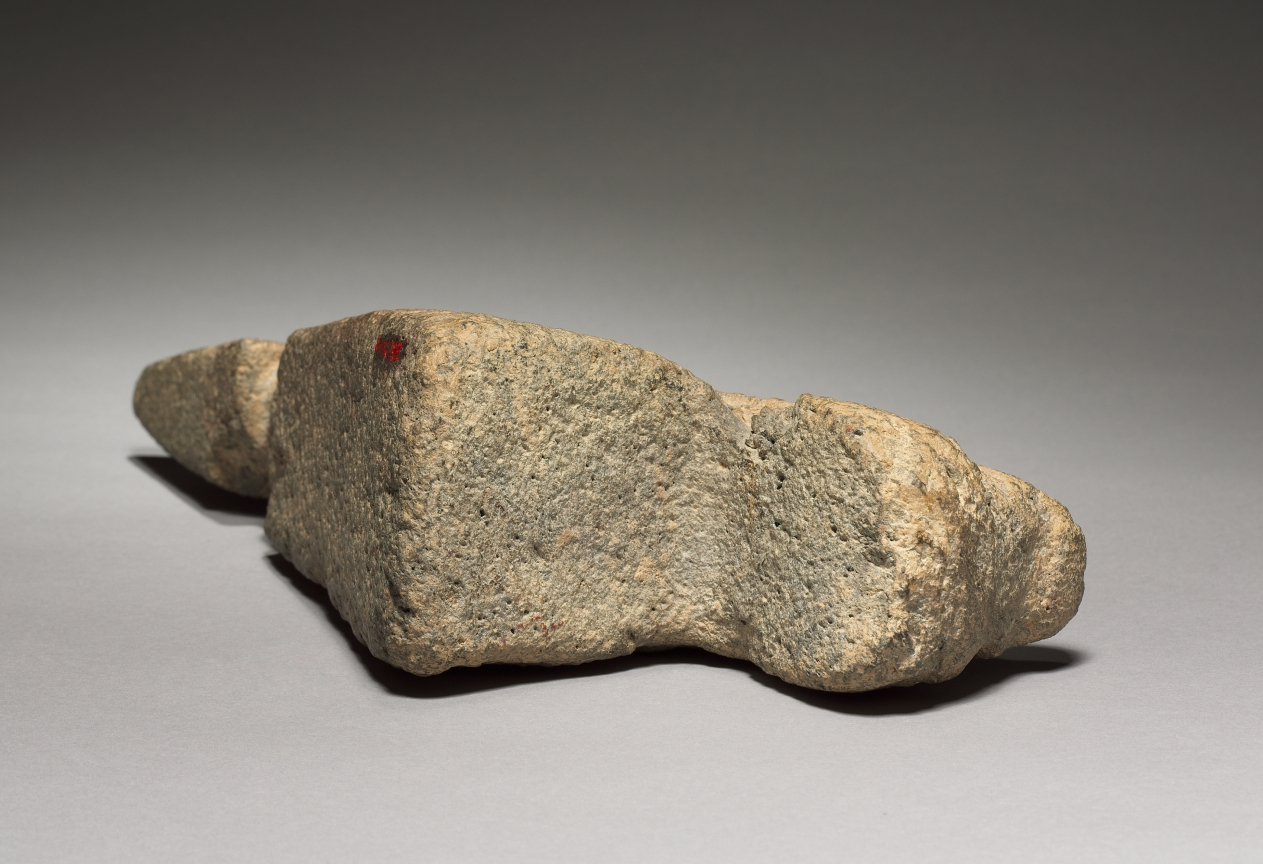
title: Bird Hacha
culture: Mexico, Veracruz, El Tajín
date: 300–900 CE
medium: gray volcanic stone with red pigment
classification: Sculpture